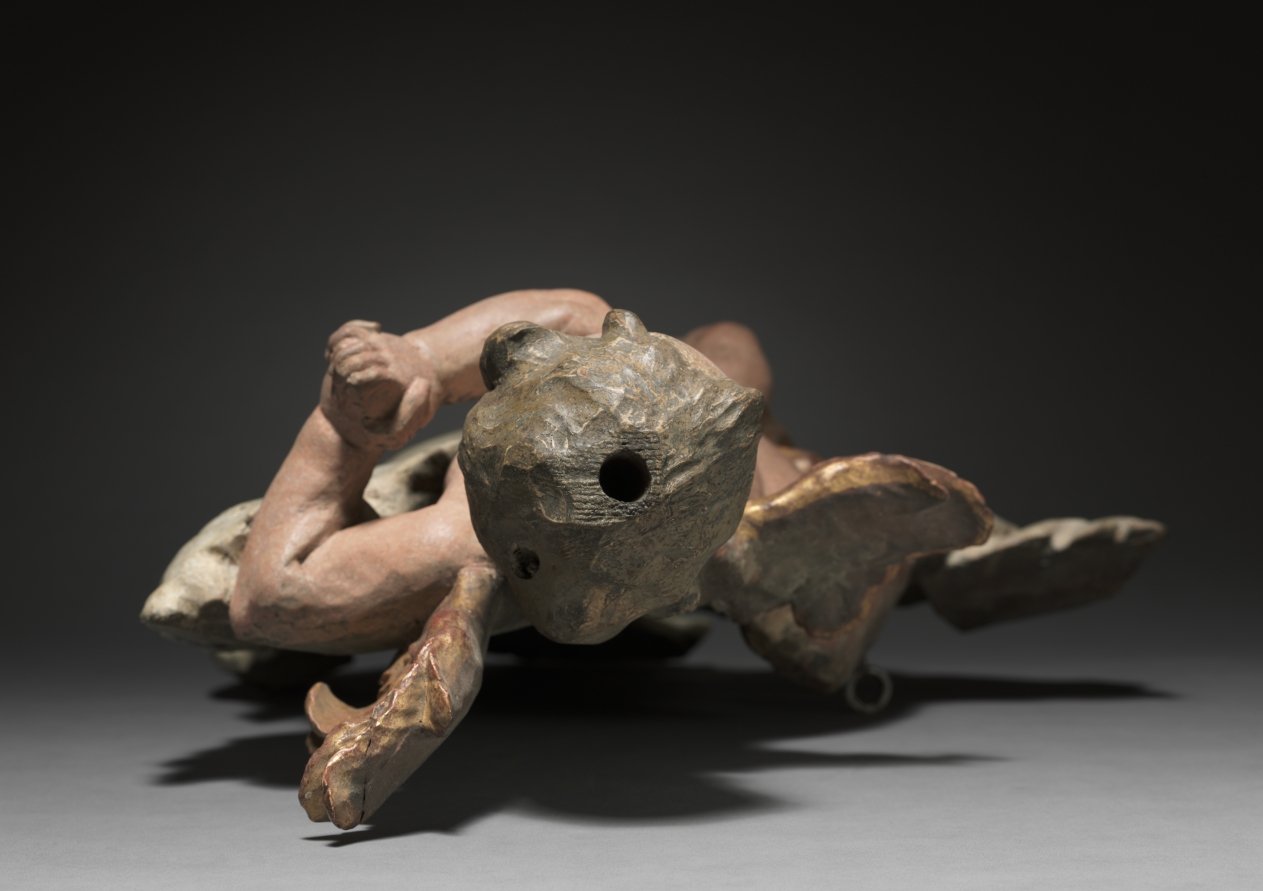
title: Putto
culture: Germany, Munich, 18th century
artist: workshop of Ignaz Günther (German, 1725–1775)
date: c. 1760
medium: painted and gilded wood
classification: Sculpture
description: This charming winged putto reclines on a cloud, hands clasped in an attitude of adoration. It is probably a fragment of a large decorative scheme of a church, perhaps the Johanneskirchen near Munich.